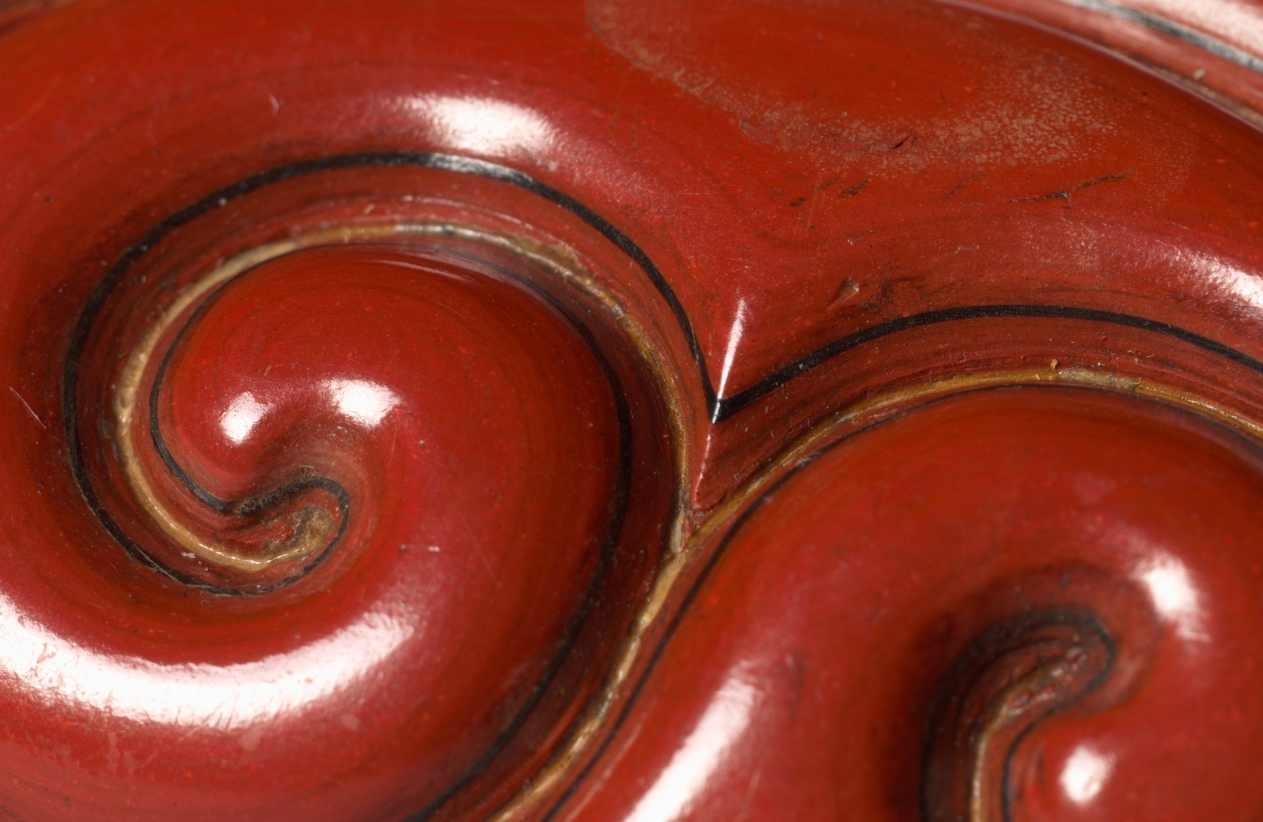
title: Lotus Dish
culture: China, Yuan dynasty (1271-1368)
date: 1271–1368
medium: Carved cinnabar-red lacquer on wood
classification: Lacquer